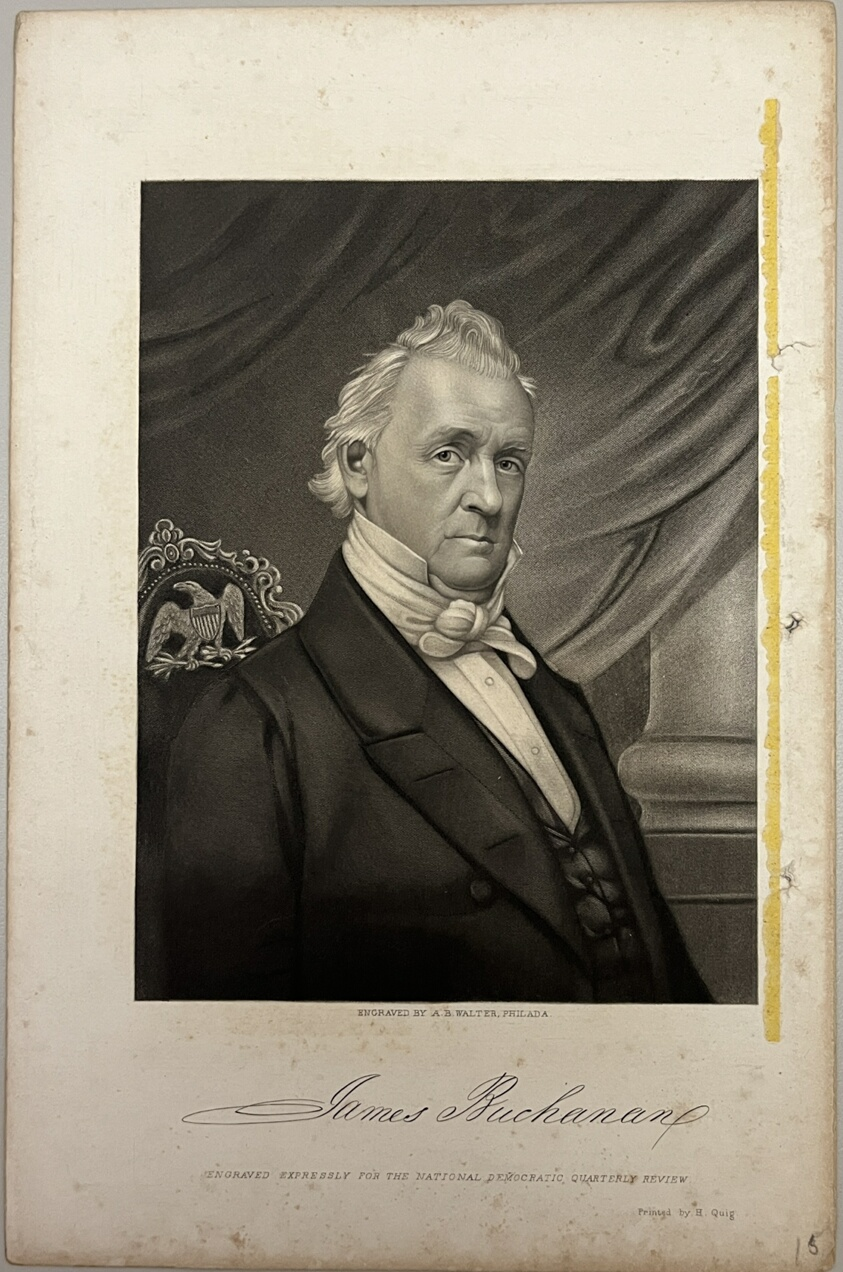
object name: Print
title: James Buchanan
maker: Adam B. Walter (American, 1820–1875); printed by H. Quig. (American, 19th century)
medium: Etching on paper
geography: United States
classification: reproduction; print; prints and drawing